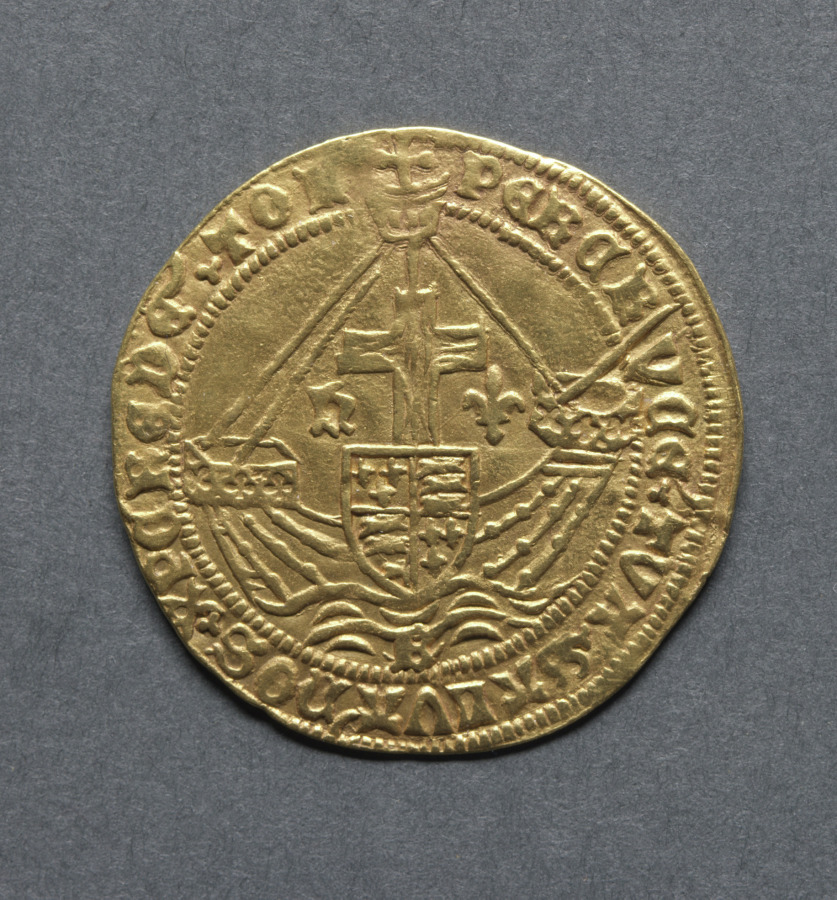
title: Angel: Ship with Shield of Arms and Cross (reverse)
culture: England, Henry VI 1422-1461 (restored 1470-1471)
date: 1470–1471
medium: gold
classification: Coins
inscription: PER CR VCE TVA. SALVA NOS XPC REDETOR